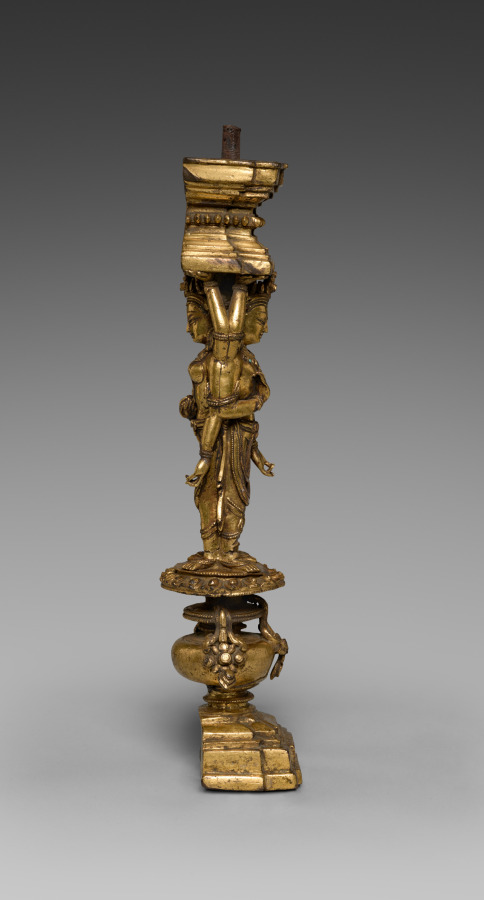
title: Support with Addorsed Figures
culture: Tibet, Densatil Monastery, 15th century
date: 1400s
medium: gilt bronze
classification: Sculpture